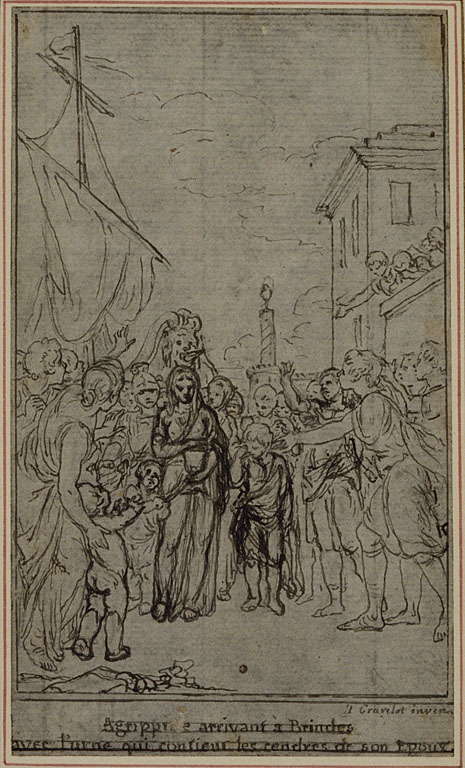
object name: Drawing and Watercolor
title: Study for an illustration in Tacitus "Tibère, ou Les Six Premiers Livres des Annales", Book III, Vol. 2, 2nd Study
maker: Hubert François Gravelot (French, 1699-1773)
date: c. 1768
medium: Pen and black ink, over graphite, on gray laid paper, incised for transfer and perimeter mounted on ivory laid paper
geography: France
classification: pen and ink drawings; drawings (visual works); prints and drawing